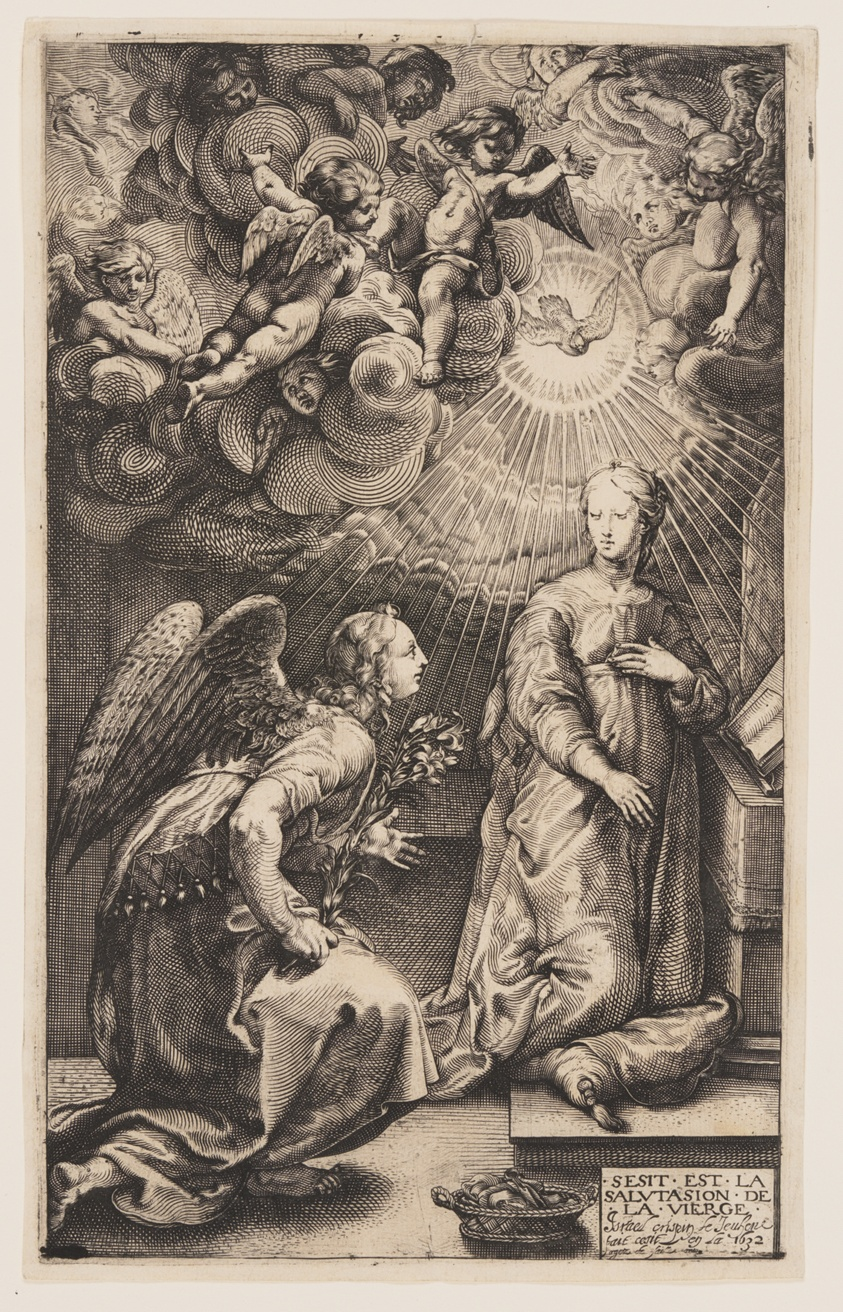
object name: Print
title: Annunciation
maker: Israël Crispin (French, born 1616); after Hendrick Goltzius (Dutch, 1558-1617)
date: 1632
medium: Engraving on ivory laid paper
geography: France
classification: engraving; paper; print; prints and drawing